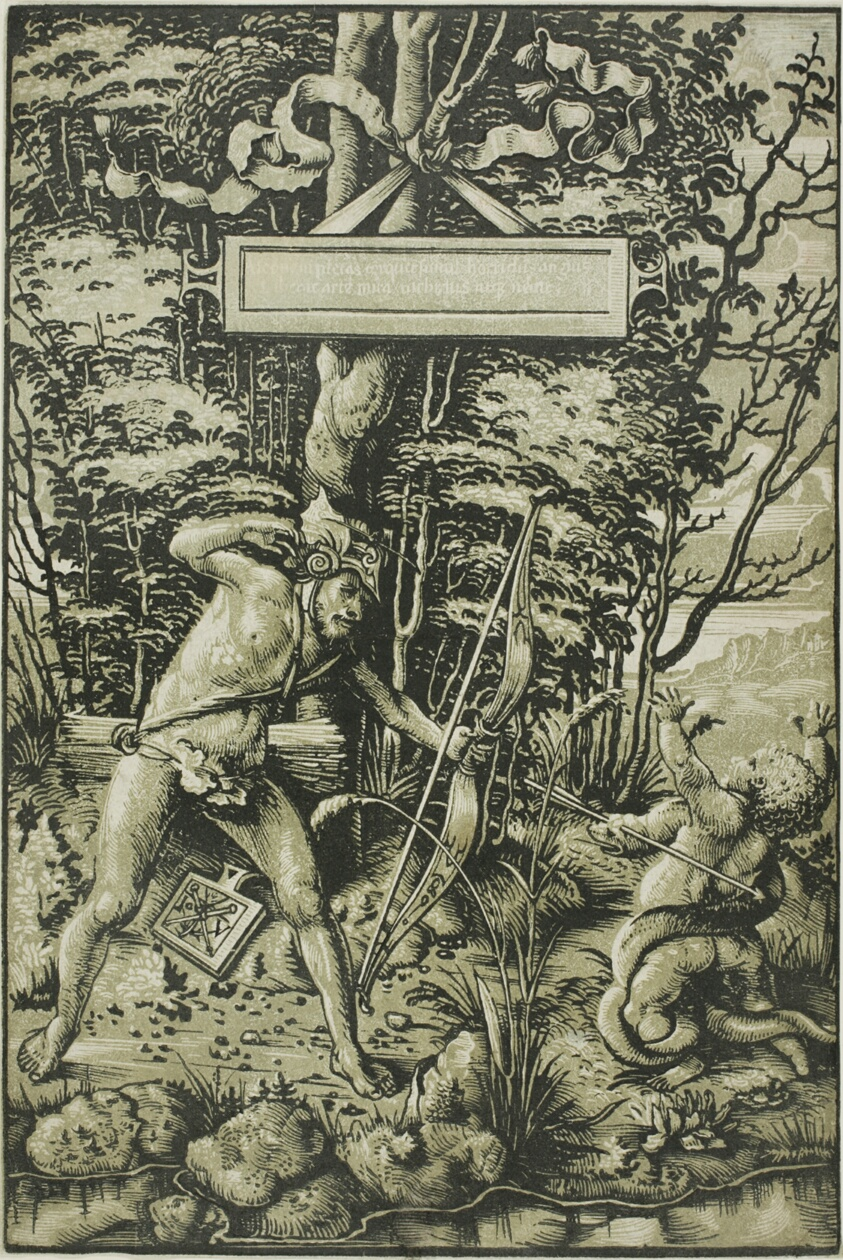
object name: Print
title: Alcon Slaying the Serpent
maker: Hans Wechtlin, I (German, 1480/85-after 1526)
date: 1510–15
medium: Chiaroscuro woodcut printed from two blocks in black and olive green on cream laid paper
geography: Germany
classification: woodcut; print; prints and drawing